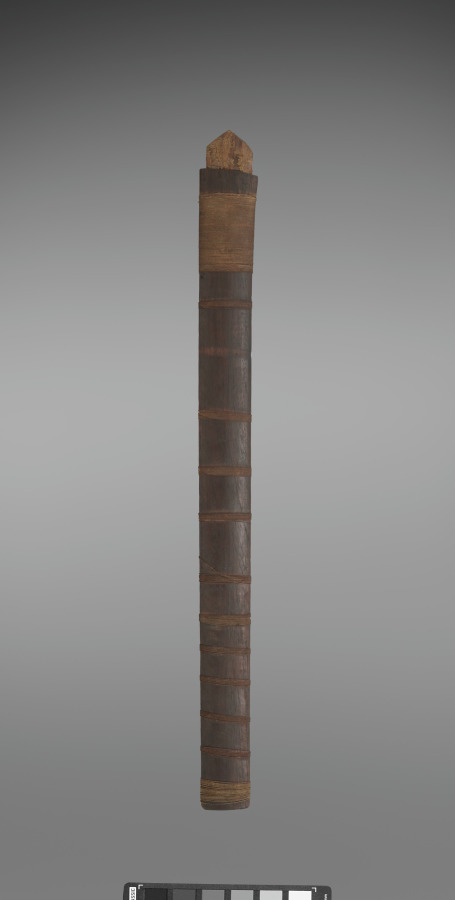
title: Scabbard for Sword (Kalis or Sundang)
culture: Philippines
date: before 1916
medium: Wood and fiber cord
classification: Arms and Armor